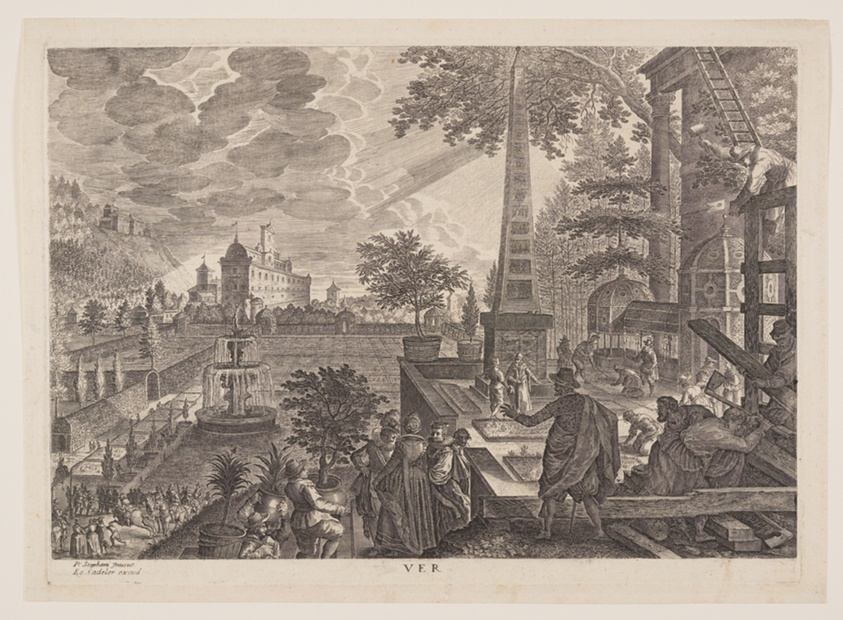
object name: Print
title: Spring, from The Four Seasons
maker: Aegidius Sadeler II (Flemish, c. 1570–1629); after Pieter Stevens (Flemish, 1567-after 1624)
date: 1620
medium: Engraving on ivory laid paper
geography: Flanders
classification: print; paper; prints and drawing; engraving